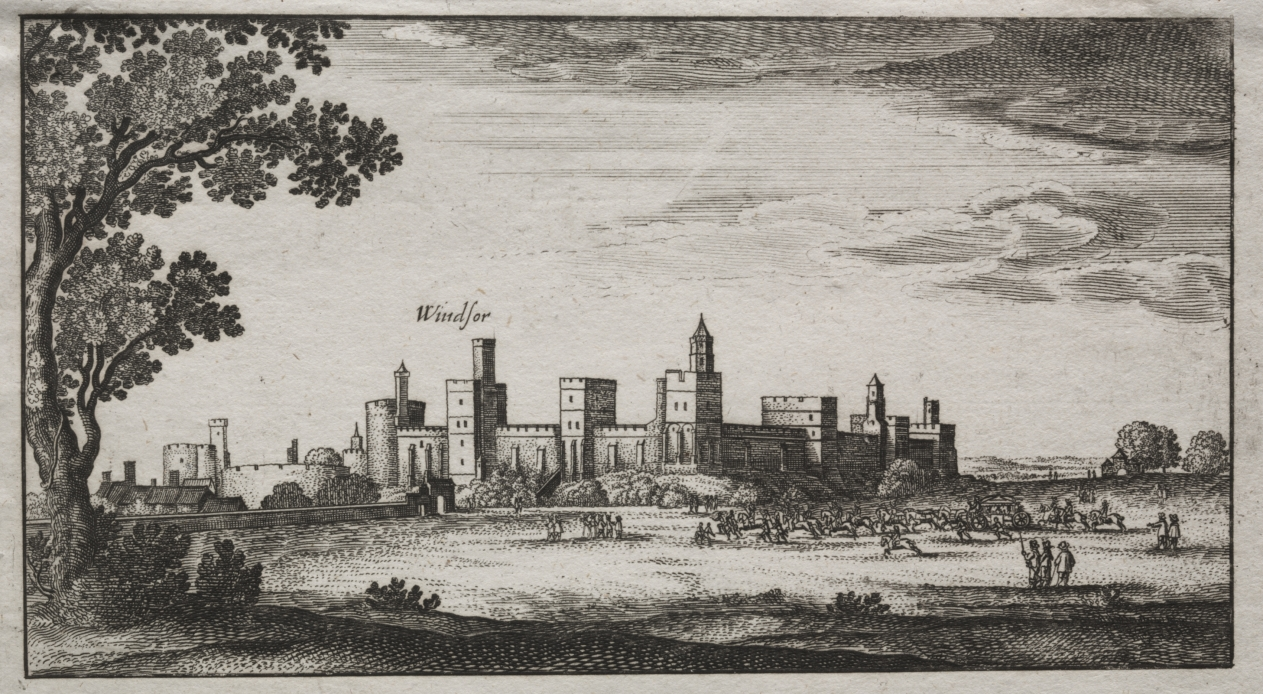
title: Windsor Castle from the Southeast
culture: England (?), 17th century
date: 1600s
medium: etching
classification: Print